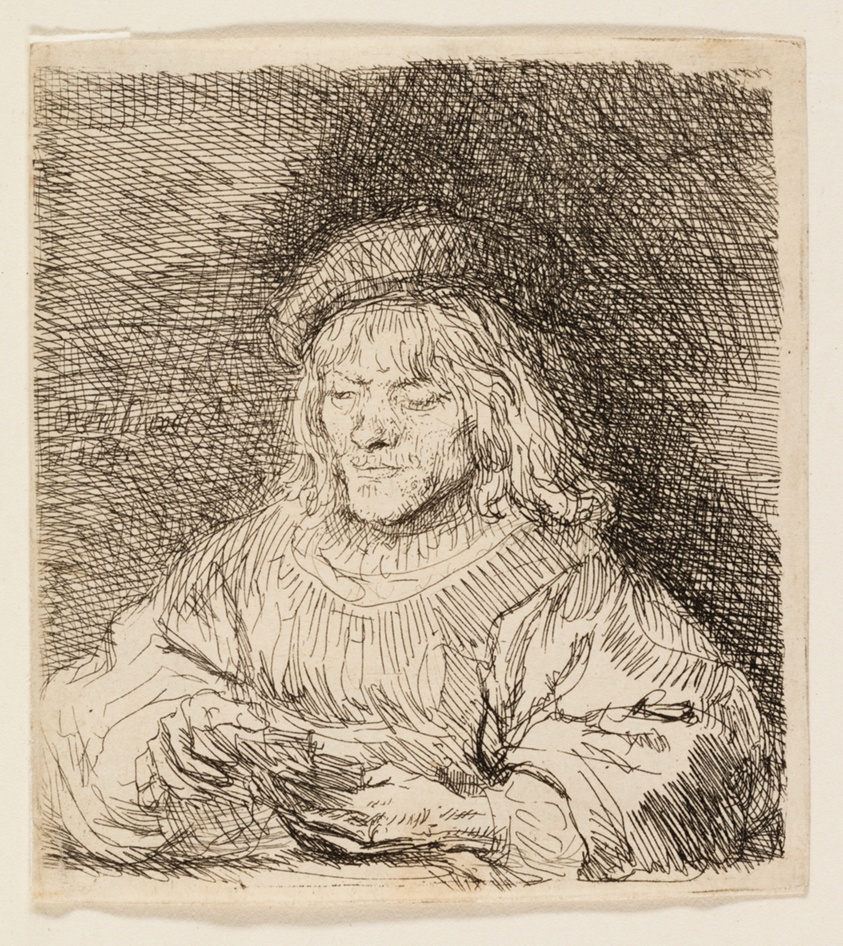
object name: Print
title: The Card Player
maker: Rembrandt van Rijn (Dutch, 1606-1669)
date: 1641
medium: Etching on paper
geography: Holland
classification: etching; print; prints and drawing; paper